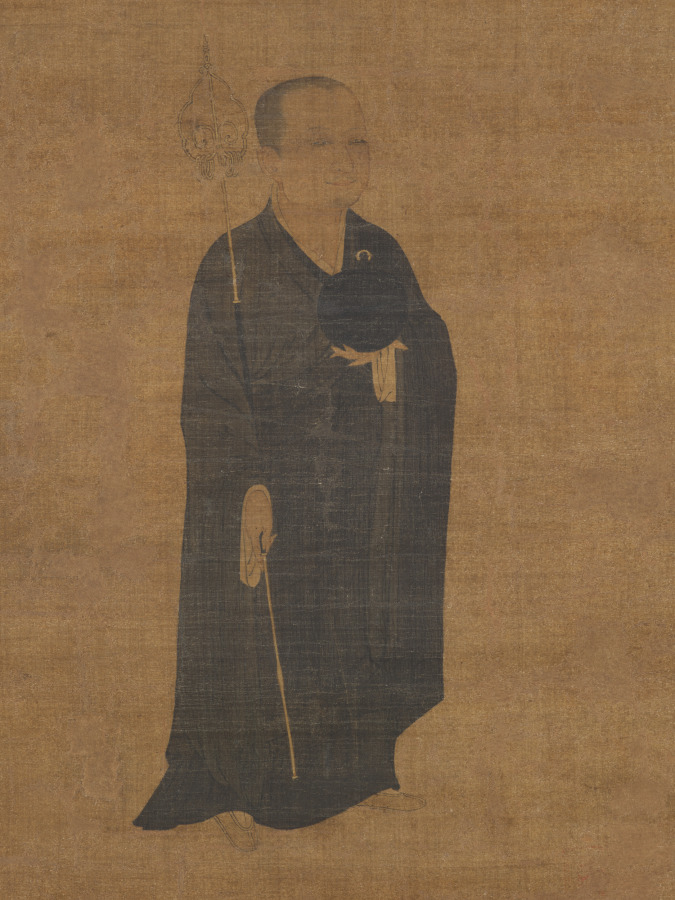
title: Portrait of Priest Dazhi (1048–1116), Master of Law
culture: China, Southern Song dynasty (1127-1279)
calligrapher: Liu Tao (Chinese, late 1000s–early 1100s)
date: 1100s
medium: Hanging scroll; ink and light color on silk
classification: Painting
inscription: Inscription by Liu Tao (late 1000s–early 1100s): Dignified with the perfection of the upasampada,/ His appearance is like his mind;/ Uncompromising and loftily aloof,/ His mind is like his appearance./ To say he is square, he proves to be round;/ He looks timid, yet his spirit is unbound./ Having no attachment, and holding no reins,/ Man and deities alike take refuge in him. (Translation by WKH, 1980)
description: Monk Yuanzhao, with the honorific title Dazhi Lüshi, Great Wisdom Master of Vinaya, is depicted here as an itinerant monk, holding his alms bowl in the left and staff in the right. In 1142, Emperor Gaozong had bestowed Yuanzhao with a posthumous title, mentioned in the inscription, which suggests that the portrait was made after the master’s death. A master of the Lü sect of Buddhism, with a calm benevolent smile on his face, Yuanzhao was active on Mount Tiantai and in Hangzhou. Later, Liu Tao, a southerner from Changxing, added the inscription. The eulogy reads: Dignified he is, perfect in his upasampada [ordination of a monk]. His appearance is like his mind. Uncompromising and aloof. His mind is like his appearance. To say he is square, he proves to be round. He looks timid, yet his spirit is unbound. Having no attachment, and holding no reins, men and deities alike take refuge in him. —translated by Wai-Kam Ho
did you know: A native of Hangzhou, the priest Dazhi was known for his eloquent exposition of Buddhist doctrines and for his success in winning many converts.